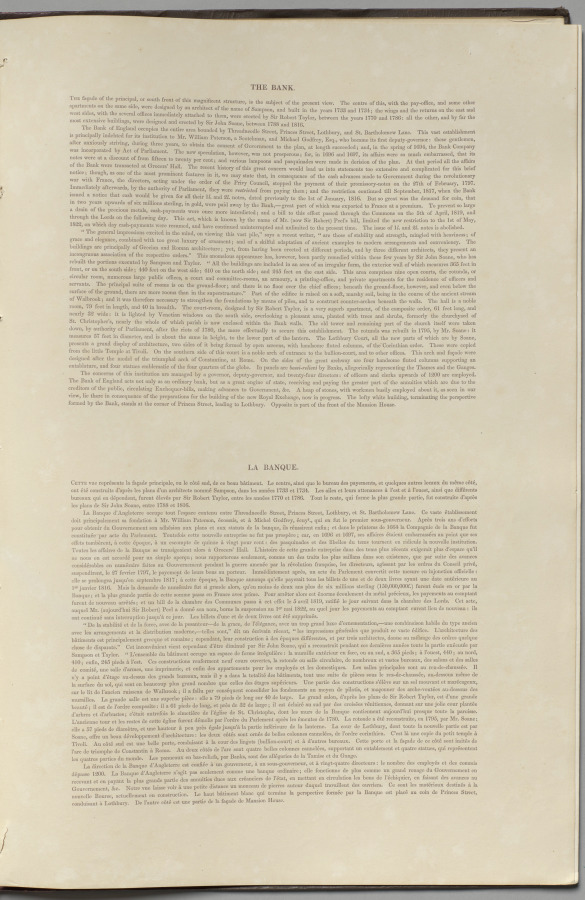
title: London As It Is: The Bank, Looking towards the Mansion House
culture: England, 19th century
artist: Thomas Shotter Boys (British, 1803–1874)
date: 1842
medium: lithograph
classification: Bound Volume